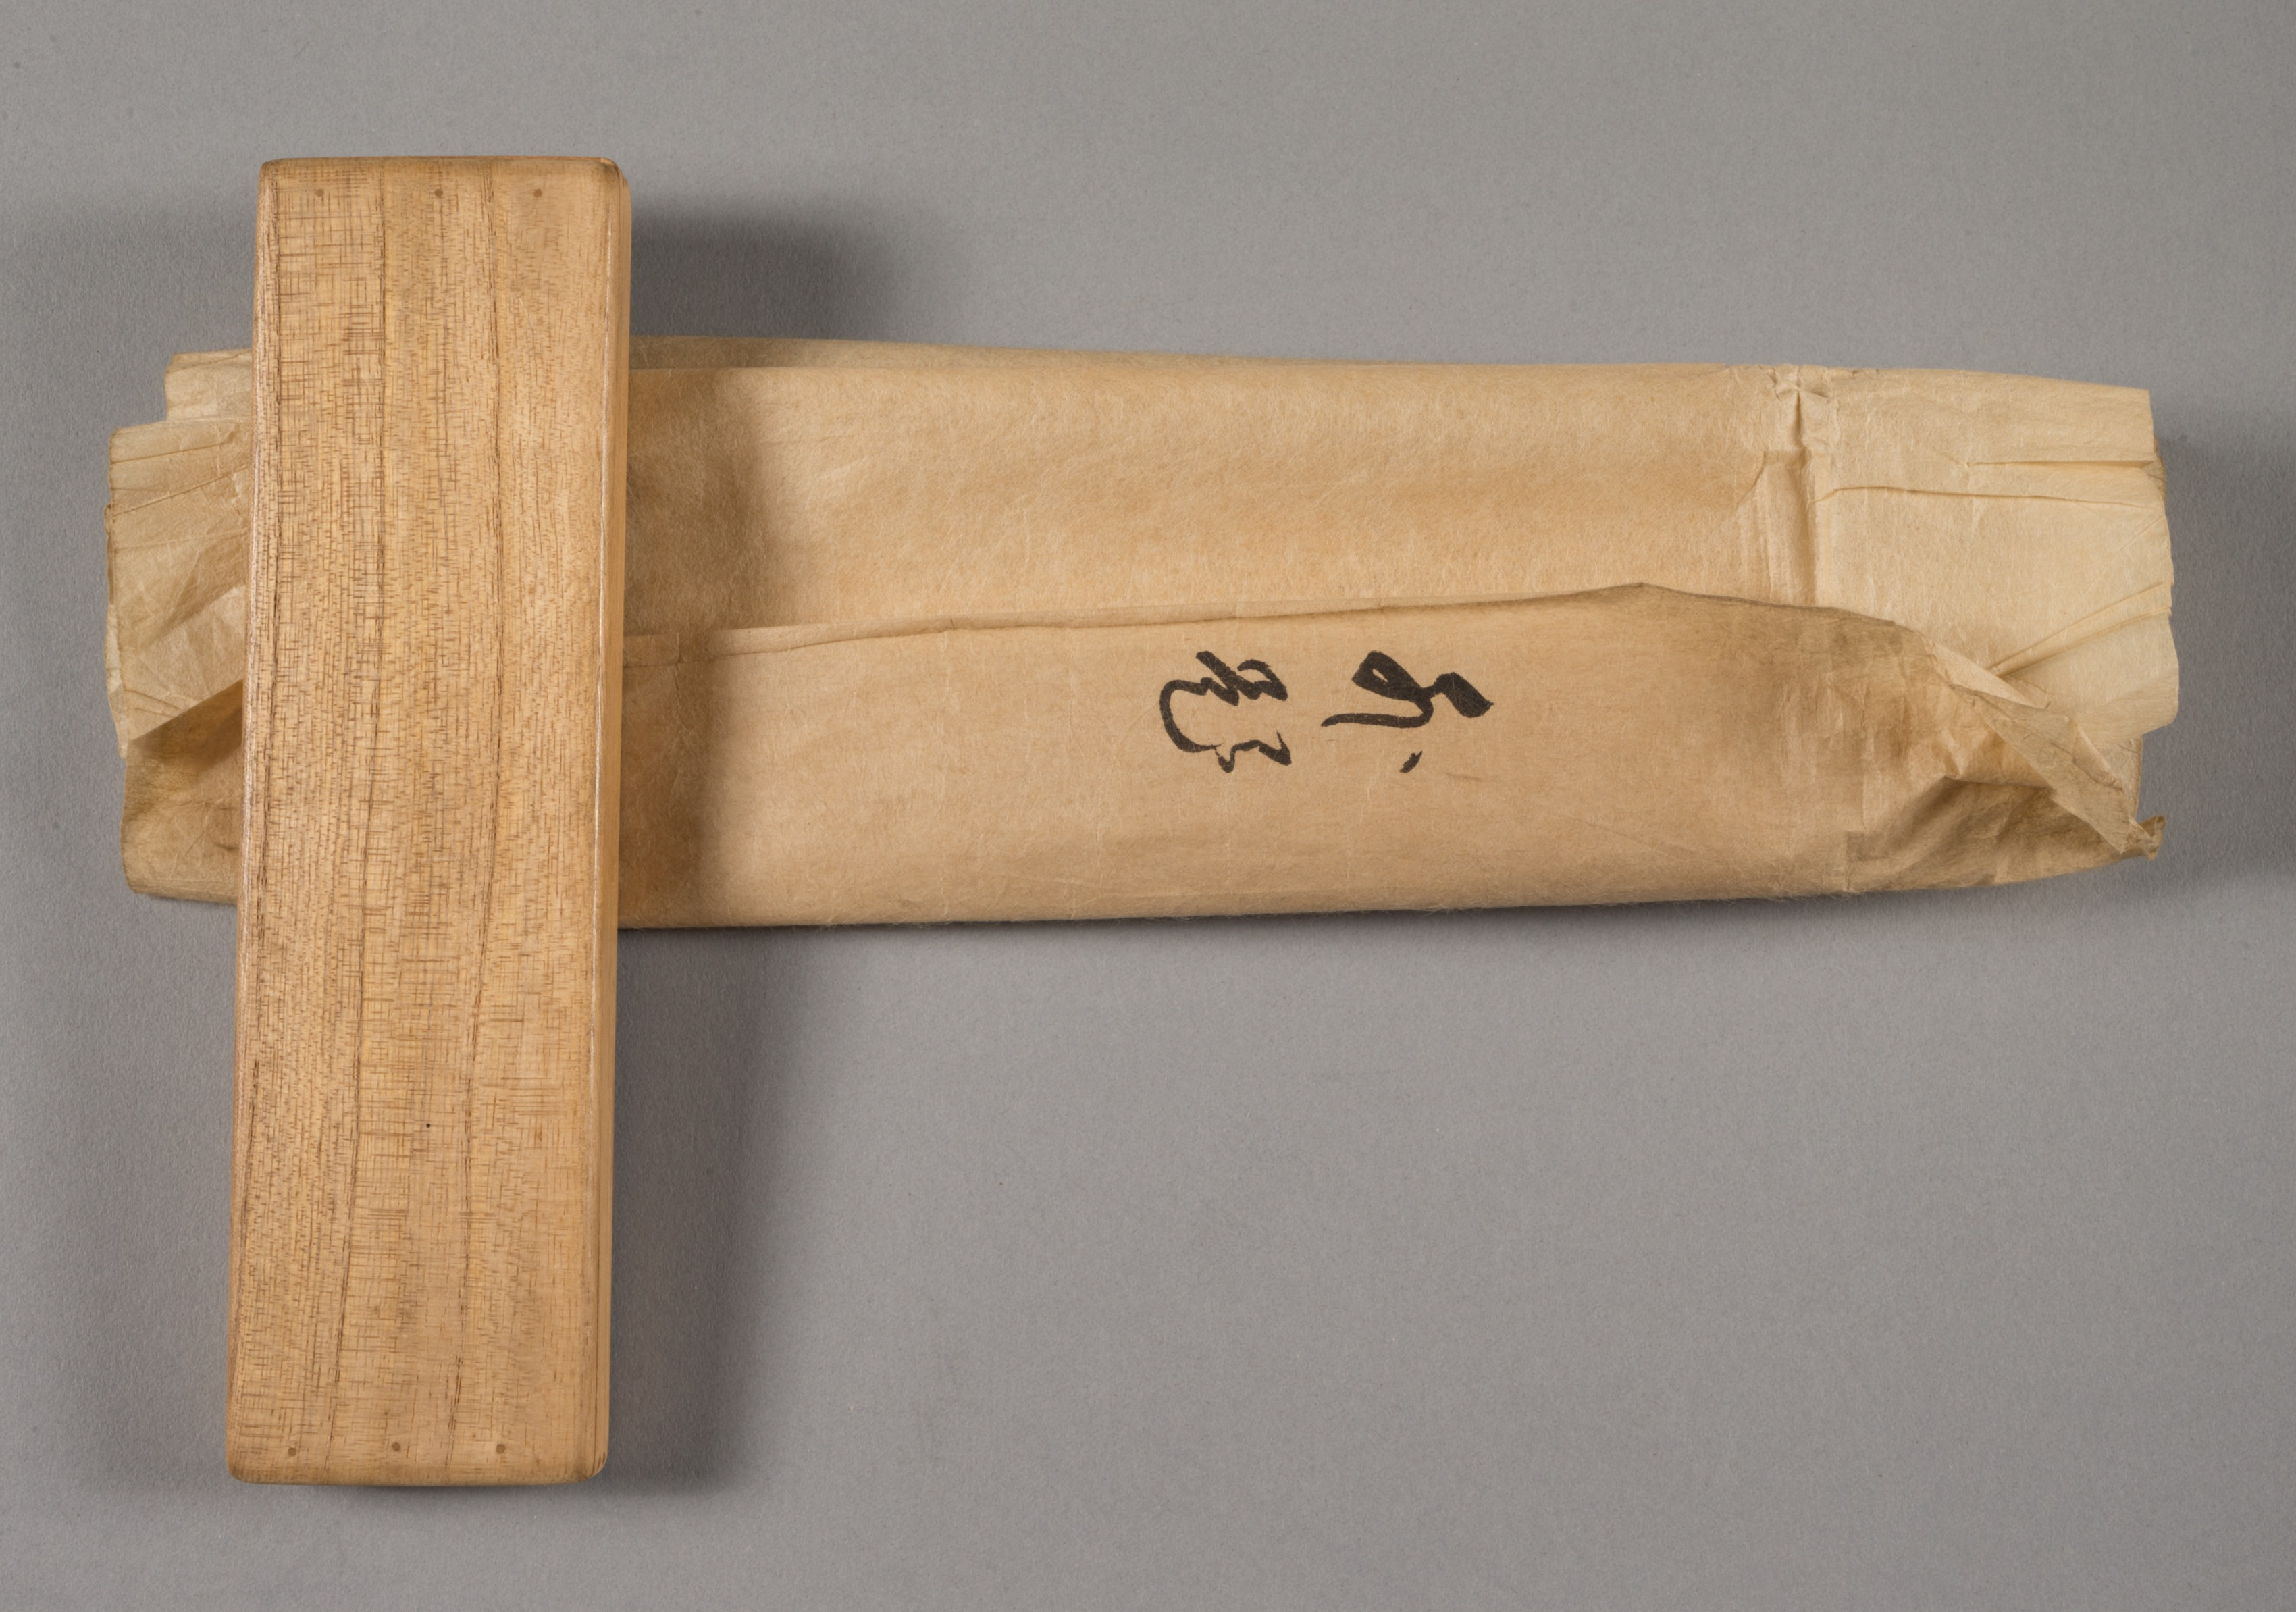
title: Crow on a Pomegranate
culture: Japan, Muromachi period (1392–1573)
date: 1500s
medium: hanging scroll; ink on paper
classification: Painting